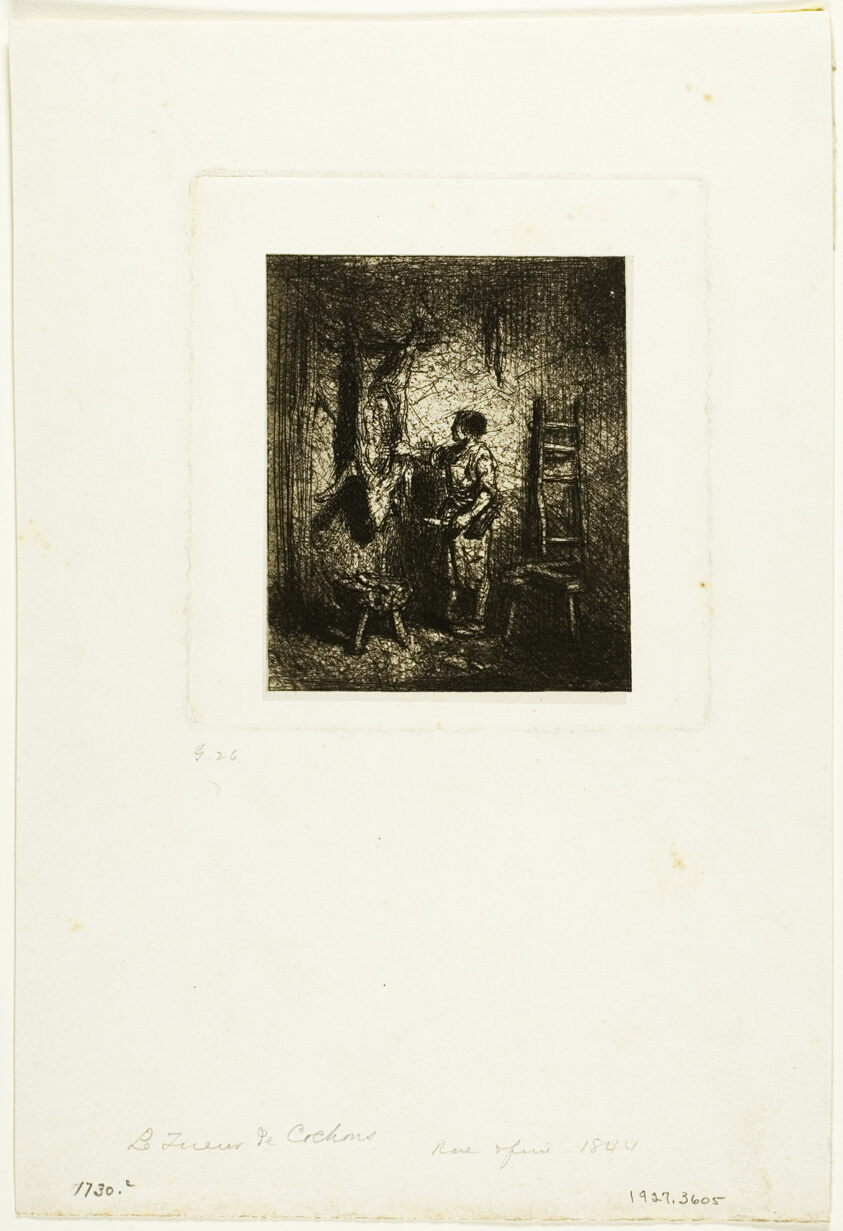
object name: Print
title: The Pig-Butcher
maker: Charles Émile Jacque (French, 1813-1894)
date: 1844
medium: Etching on light gray China paper laid down on ivory wove paper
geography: France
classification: etching; print; prints and drawing